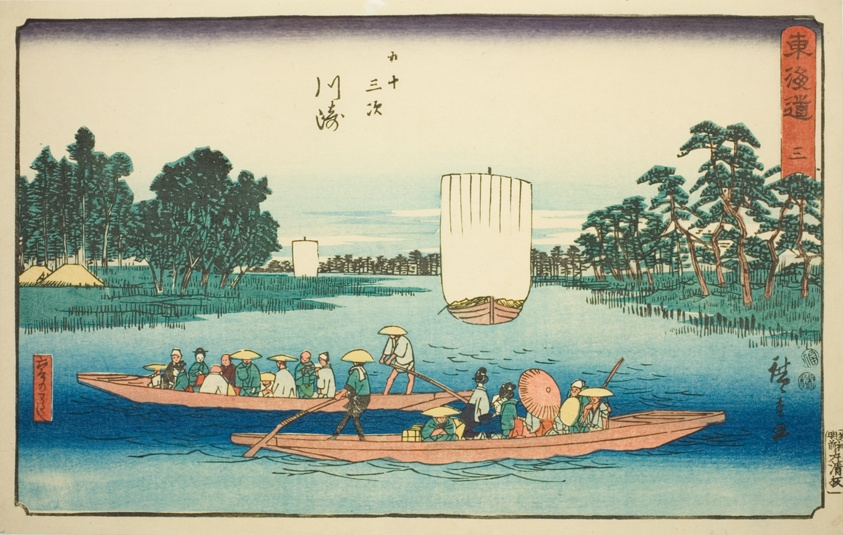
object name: Print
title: Kawasaki: The Rokugo Ferry (Kawasaki, Rokugo no watashi)—No. 3, from the series "Fifty-three Stations of the Tokaido (Tokaido gojusan tsugi)," also known as the Reisho Tokaido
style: Japanese (culture or style)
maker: Utagawa Hiroshige 歌川 広重; Japanese, 1797-1858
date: c. 1847/52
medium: Color woodblock print; oban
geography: Japan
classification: woodblock print; print; asian art